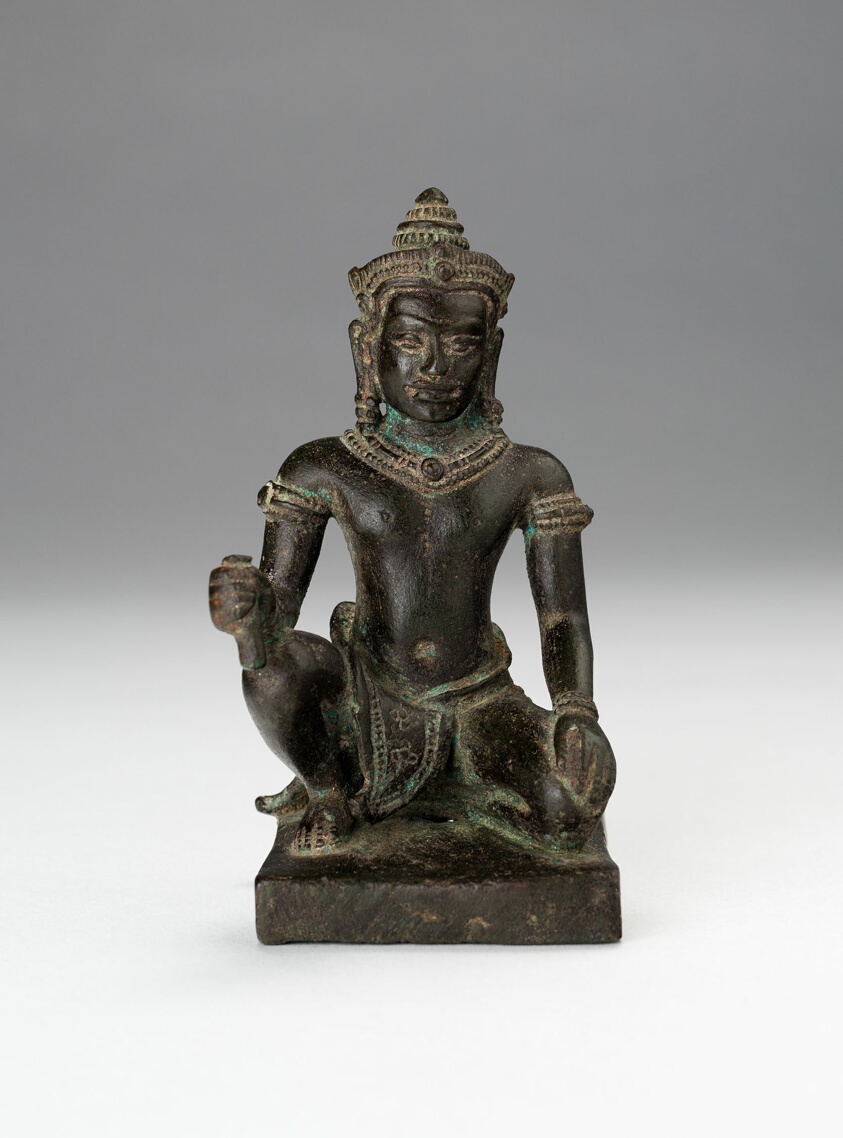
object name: Sculpture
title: The Divine Architect, Vishvakarman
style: Southeast Asian, angkorean, cambodian, asian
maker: Cambodia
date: Angkor period, c. 13th century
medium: Bronze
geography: Cambodia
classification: bronze; metal; sculpture; asian art